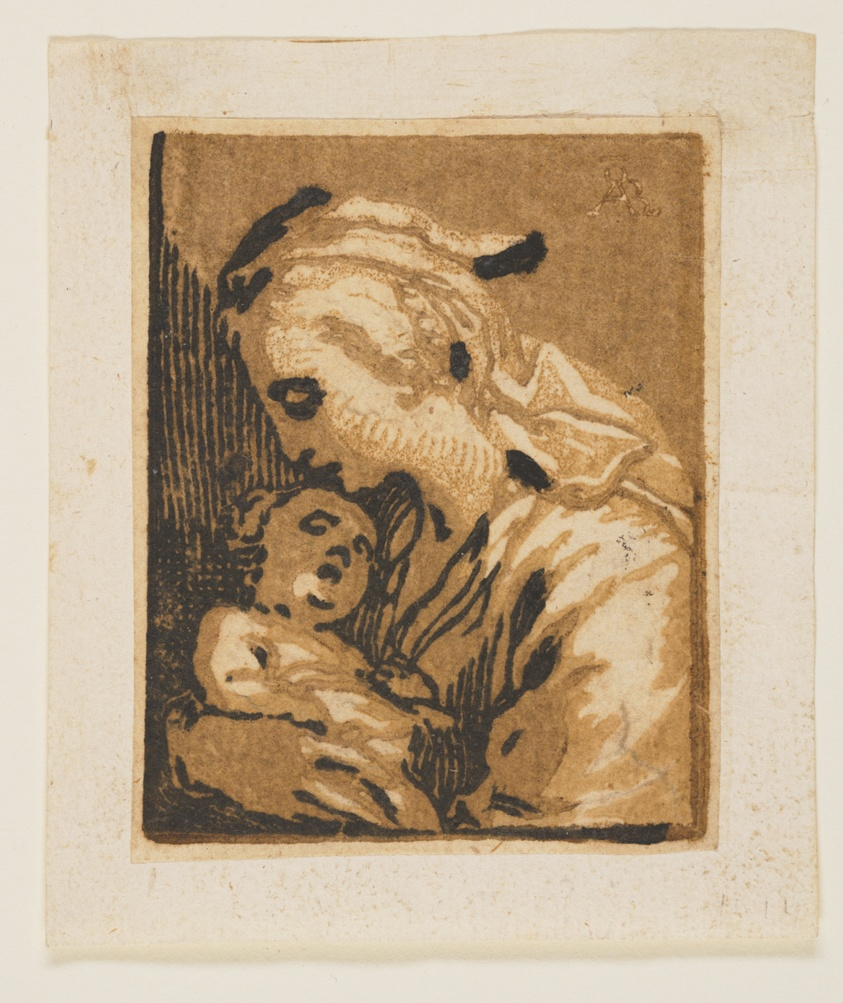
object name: Print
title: The Madonna and Child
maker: Attributed to Ludolph Büsinck (German, c. 1590-after 1643); after Abraham Bloemaert (Dutch, 1566–1651)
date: c. 1620-23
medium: Chiaroscuro woodcut from three blocks on ivory laid paper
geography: Netherlands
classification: print; paper; prints and drawing; chiaroscuro woodcut